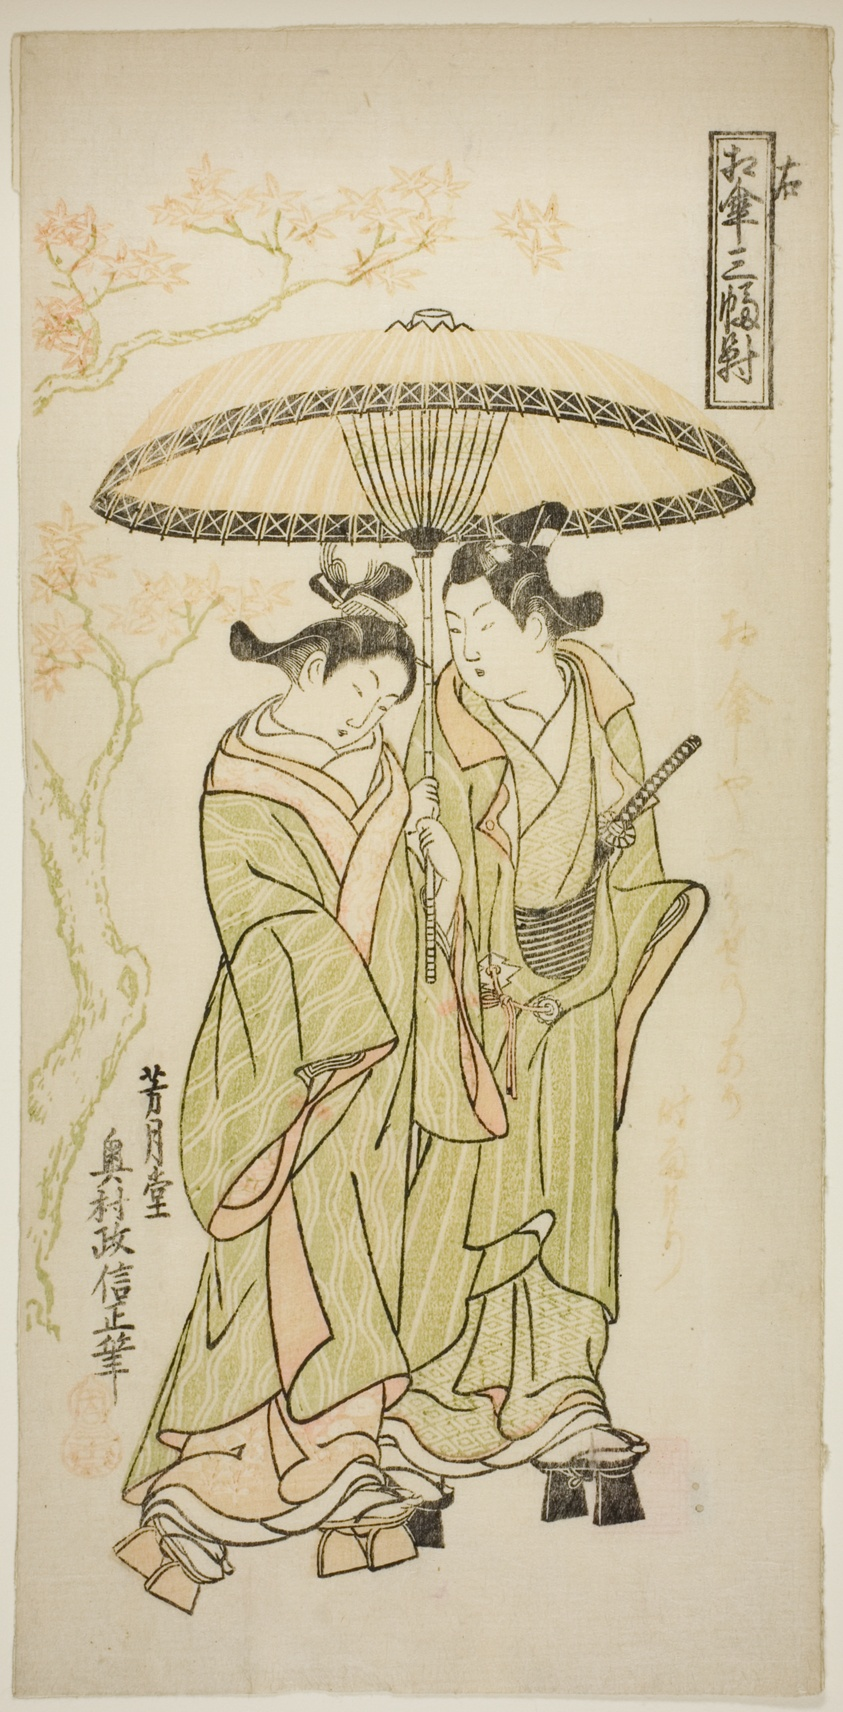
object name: Print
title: The Autumn Shower, from "Sharing an Umbrella: A Set of Three (Aigasa sanpukutsui)"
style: Japanese (culture or style)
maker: Okumura Masanobu (Japanese, 1686-1764)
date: c. 1748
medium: Color woodblock print; left sheet of hosoban triptych, benizuri-e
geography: Japan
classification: woodblock print; print; asian art